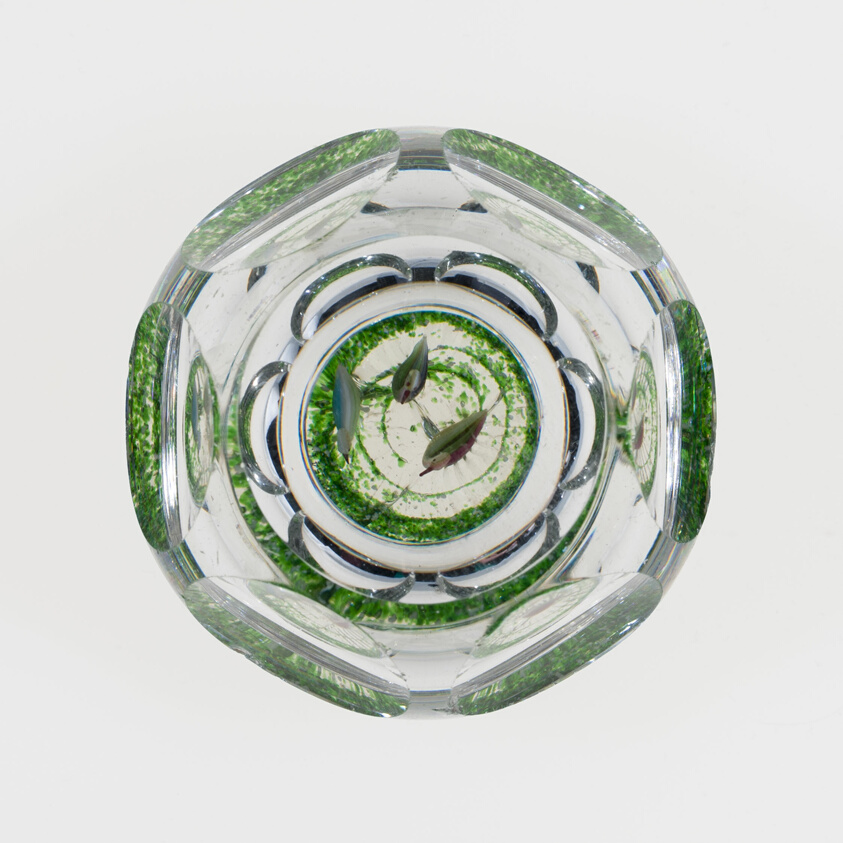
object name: Glass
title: Paperweight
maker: Baccarat Glassworks (Cristalleries de Baccarat); Lorraine, France, founded 1764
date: 19th century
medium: Glass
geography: France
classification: paperweight; glass